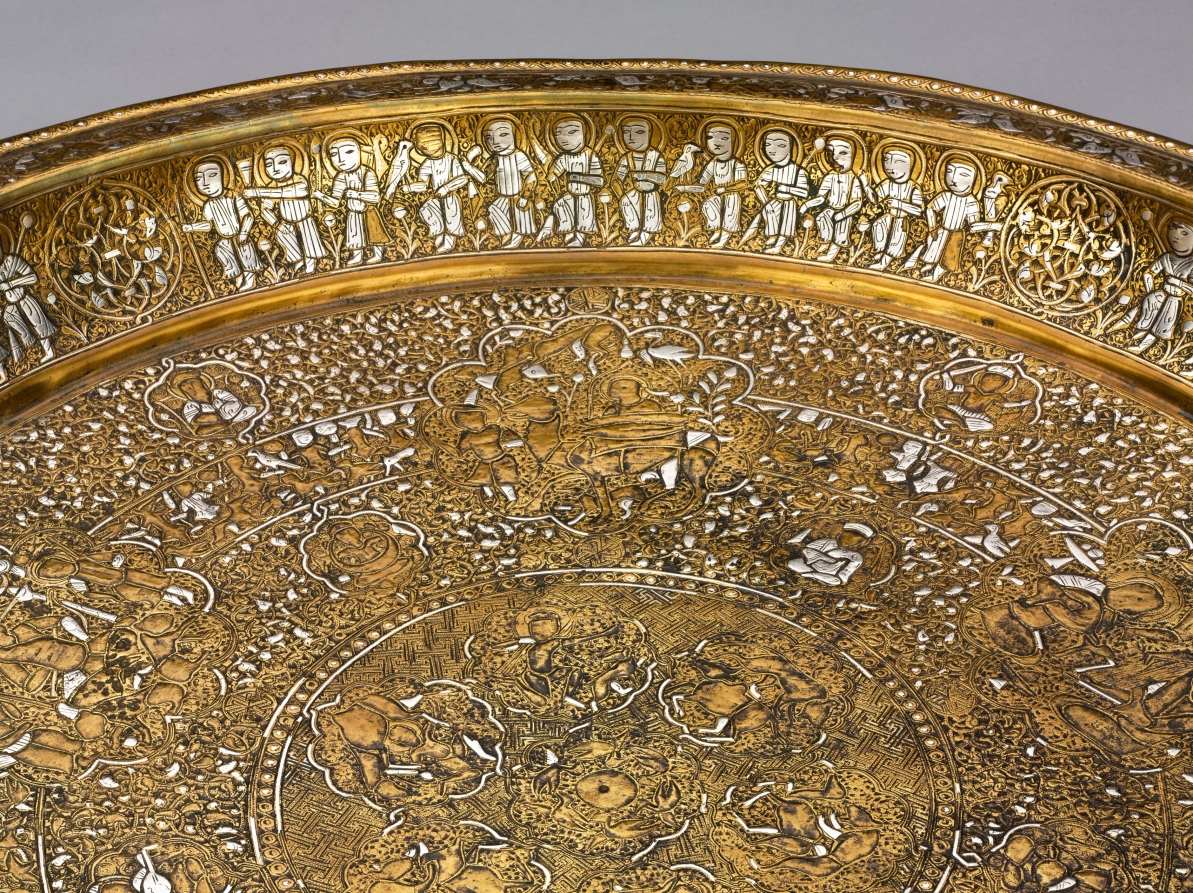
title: Tray Portraying Courtly Pleasures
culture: Syria, Ayyubid period (1171–1260)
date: 1240s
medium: sheet brass inlaid with silver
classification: Metalwork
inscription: The presence of ligatures in the narrow circular bands with interconnected human and animal figures suggests this may be a degenerate form of animated script. It is indecipherable.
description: This tray features images of courtly life interspersed with astronomical symbols. The scenes contained within large multilobed medallions display an enthroned prince with lions at his feet, a banquet, a hunt, dancers, and musicians. Contained within the concentric circles there are also references to solar and lunar motifs, including figures holding sunbursts and lunar crescents. This tray is made of a single sheet of brass and the silver inlay, which is best preserved on the tray’s inner curve, suggests its original brilliance.